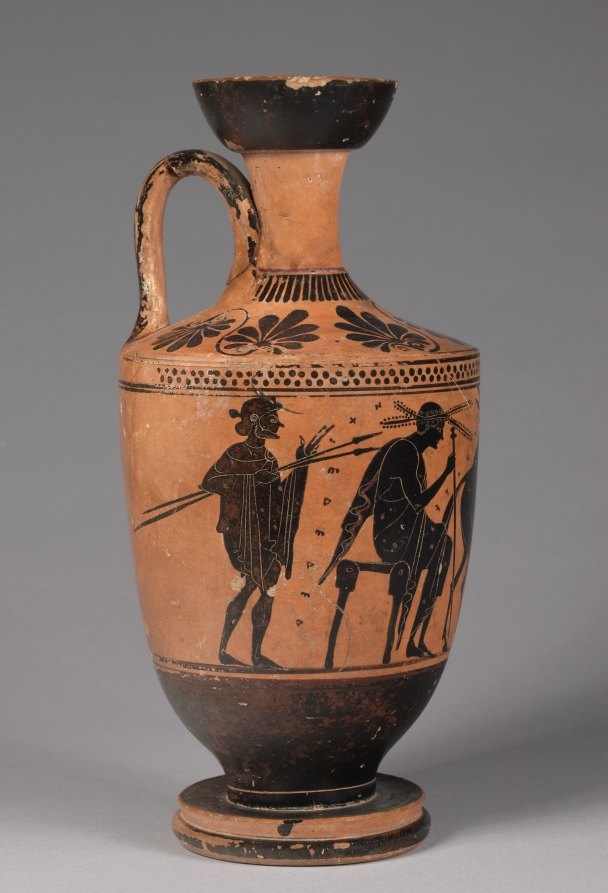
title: Black-Figure Lekythos (Oil Vessel): Seated Men, Warriors and Horse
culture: Greek, Attic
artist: attributed to Leagros Group (Greek, Attic, active c. 520–500 BCE)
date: c. 510–500 BCE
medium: ceramic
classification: Ceramic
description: Four men decorate the body of this sturdy oil vessel, perhaps in a scene of homecoming. Unlike on later, white-ground lekythoi, the painter has used white only as an accent—now faded—on the shield and the clothing and broad-brimmed hats of some of the men. The letters scattered across the background do not spell any recognizable Greek words, perhaps suggesting an illiterate painter and/or clientele.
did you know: As usual for lekythoi painted by the Leagros Group, seven palmettes decorate the shoulder.